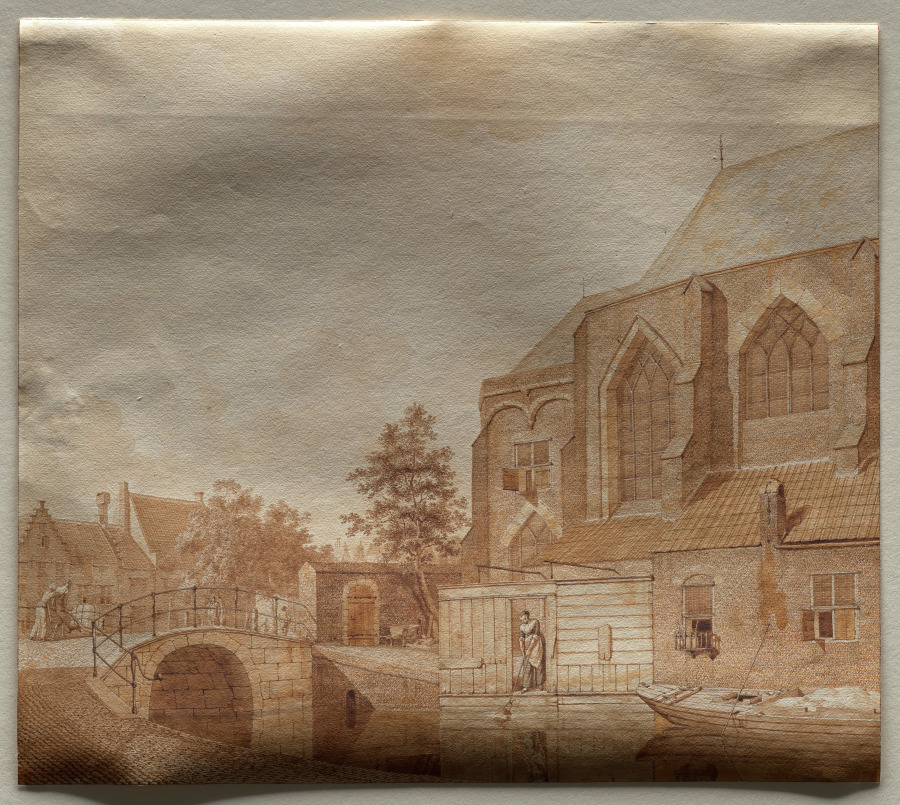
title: A View of the Nieuwe Kerk, Delft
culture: Netherlands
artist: Johannes Huibert Prins (Dutch, 1757–1806)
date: 1793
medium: Brush, point of brush and brown ink and wash with traces of graphite on cream medium-weight wove paper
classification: Drawing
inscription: Brown ink stamp, verso, lower right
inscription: Written in pencil on verso: "[illegible]"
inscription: Written in brown ink on verso: "A?u de Niewe Kerk le (?) Delft van de agtenzede le zieu/F.H. Prins ad viv del 1793"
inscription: Written in pencil on verso: "[illegible/illegible]"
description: Johannes Huibert Prins made small-scale works on paper such as this drawing featuring scenes of Dutch cities and the people who inhabited them going about their everyday lives. In this drawing, the large Nieuwe Kerk (New Church) in the city of Delft is shown from the side, while a matron fills a bucket for washing from the canal and laborers and other urban inhabitants cross the bridge beyond. Prins's technique, based on that of the artist Jan van der Heyden who worked about 100 years earlier, relied on minute detail—down to the mortar between each brick—achieved with astounding control of the ink and wash.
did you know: On the bridge a laborer pushes a heavy parcel on a wheelbarrow aided by a woman who pushes him from behind.